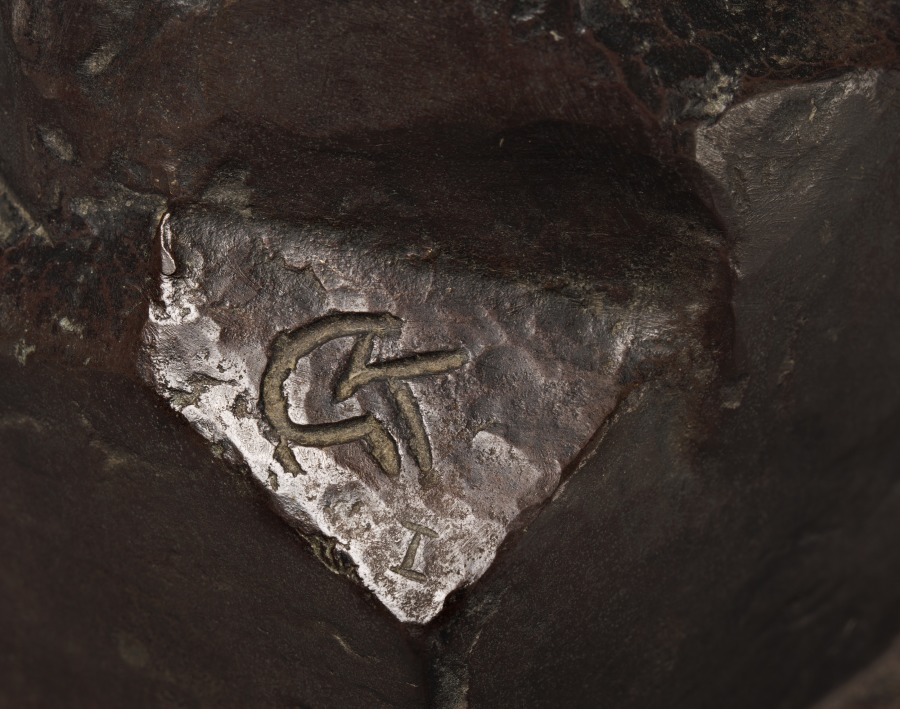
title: Adagio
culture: Germany, 20th century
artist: George Kolbe (German, 1877–1947)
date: 1923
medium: gilt bronze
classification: Sculpture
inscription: Signed lower left corner: "GK II"